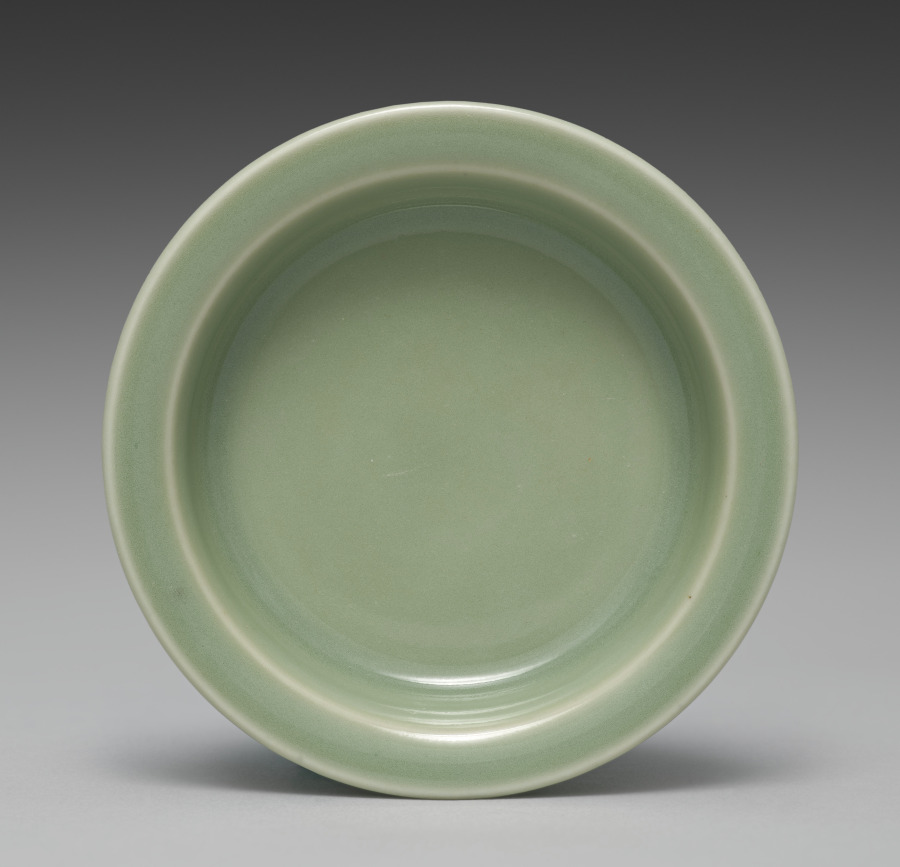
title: Saucer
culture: Japan, Meiji period (1868–1912)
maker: Seifū Yohei III (Japanese, 1851–1914)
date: 1893–1914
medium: One from a set of ten dishes; porcelain with green glaze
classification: Ceramic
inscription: 清風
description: Yohei III’s main output for his sophisticated clientele was in the form of tea sets and dining sets. He created a range of dishes in green glazes. He often produced in pairs, sets of five, or sets of ten. For this set of ten small dishes in a simple, round form that emphasizes the glaze above all, the box lid designates the piece as seiji, or green-glazed porcelain, using a general term for the extensive palette of green glazes often called celadon in English. The box lid further identifies the dishes themselves as tōchō, literally “bean-sized saucers,” a size that makes them suitable for dipping sauces.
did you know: The ten dishes in this set are stored in stacks of five in a two-compartment box.